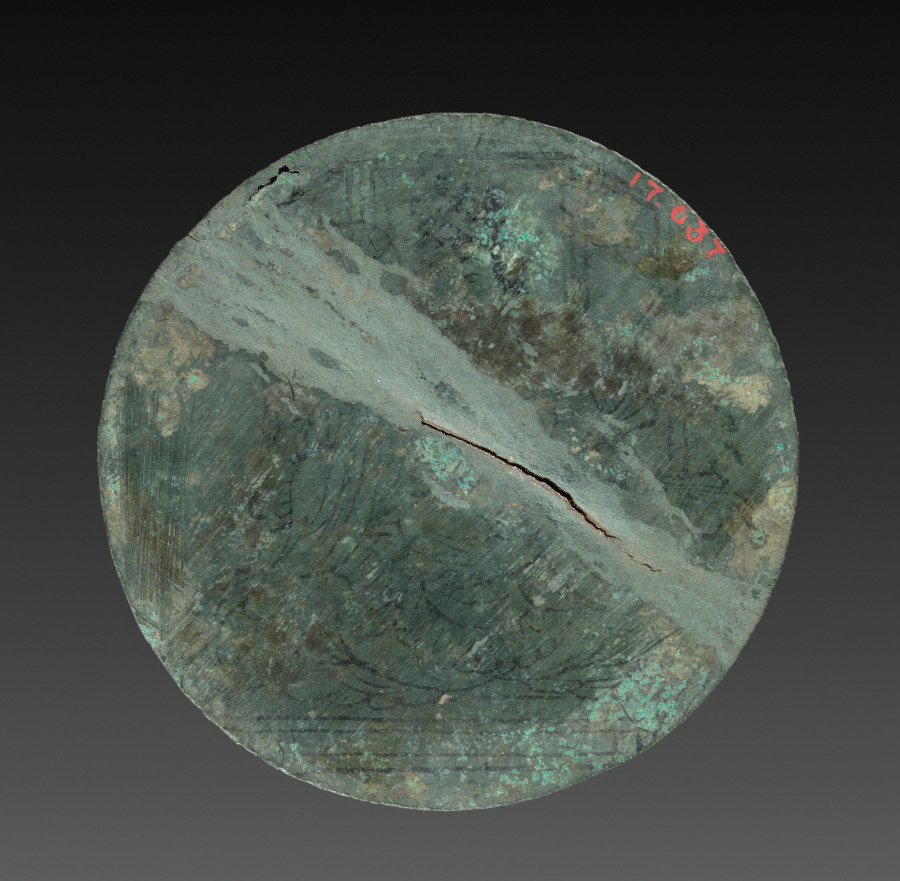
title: Mirror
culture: Japan, Heian period (794–1185)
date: 794–1185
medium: bronze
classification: Metalwork